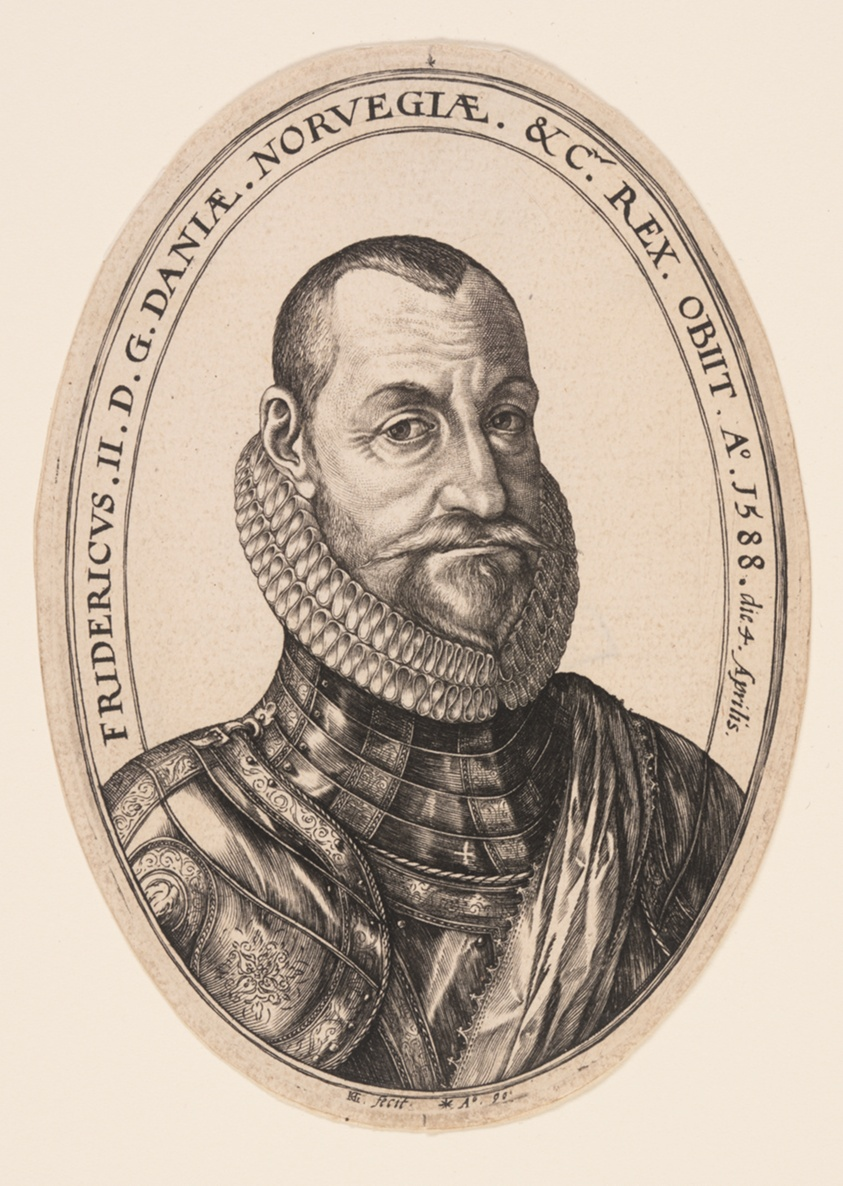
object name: Print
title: Frederick II, King of Denmark and Norway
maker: Hendrick Goltzius (Dutch, 1558–1617)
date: 1590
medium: Engraving on laid paper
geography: Netherlands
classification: engraving; paper; print; prints and drawing